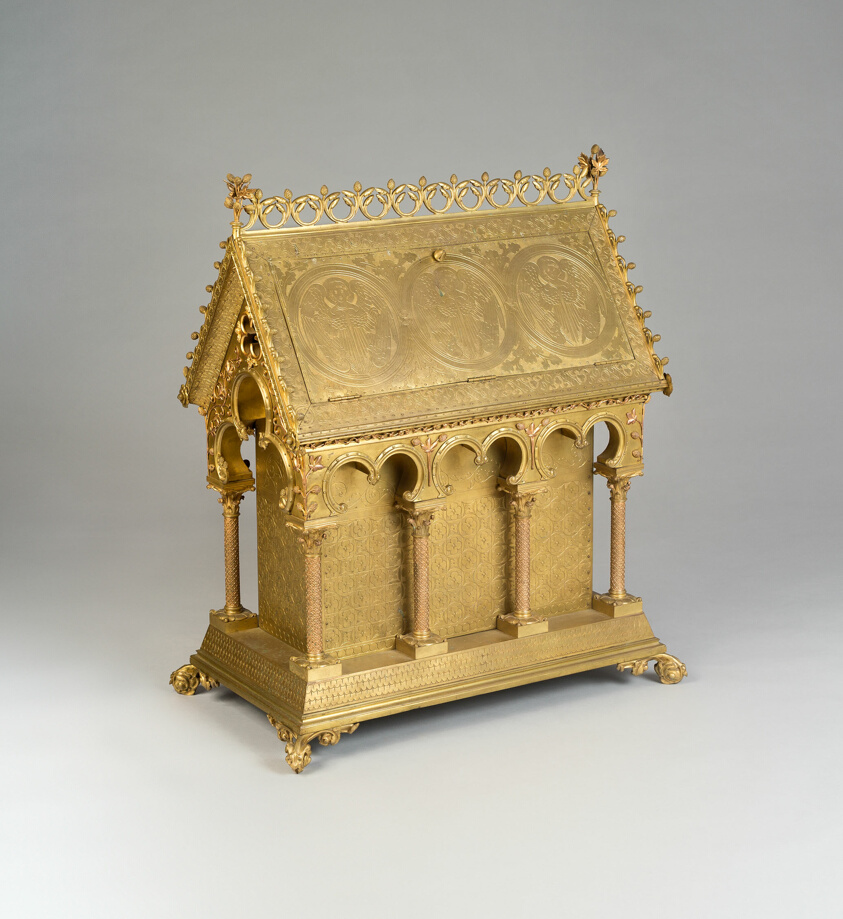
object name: Metalwork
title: Reliquary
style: gothic revival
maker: Eugène Emmanuel Viollet-le-Duc; French, 1814–1879; Made by Louis Bachelet; Paris, 1851–c. 1880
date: c. 1851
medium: Gilt bronze over wooden support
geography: Paris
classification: reliquary; container; metalwork; ceremonial object; religious